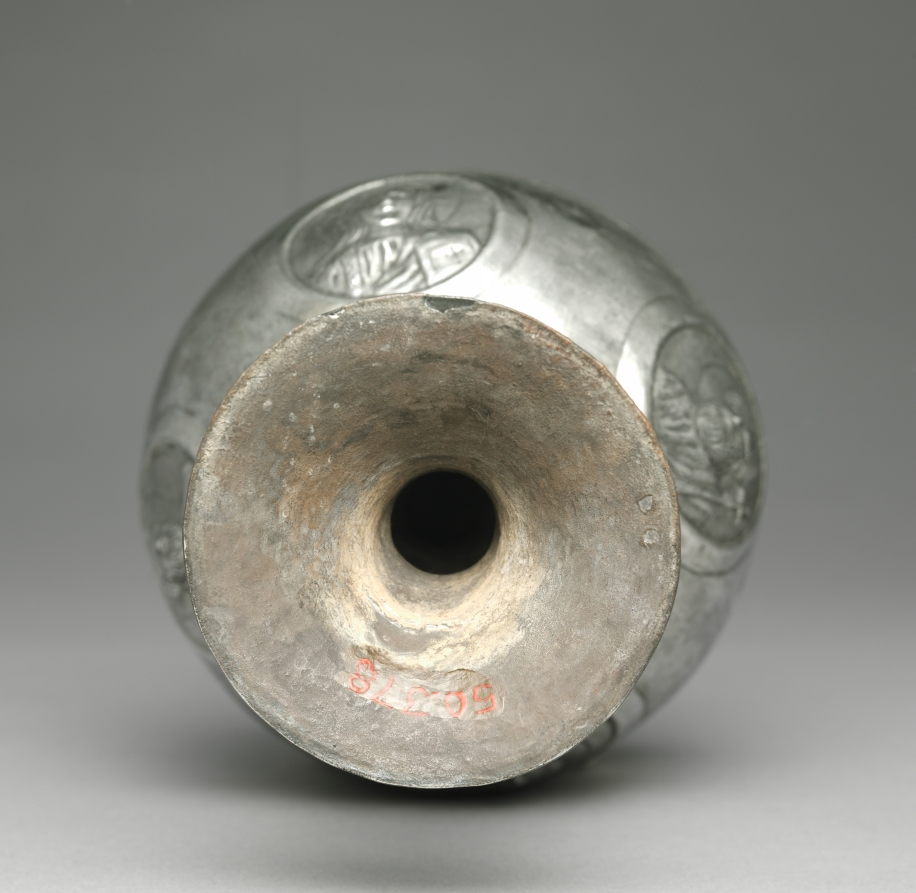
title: Chalice from the Beth Misona Treasure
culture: early Byzantium, Constantinople or Syria, Byzantine period, 6th-7th Century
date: c. 500–700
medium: silver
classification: Metalwork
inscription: the Greek inscription at the top, under an engraved line translates as: + The priest, KYRIAKOS, son of DOMNOS, (gave this chalice) to St. Sergios, in the time of Zeno the priest.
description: These four liturgical silver vessels—a paten and three chalices (1950.378–81)—form what is now called the Beth Misona Treasure, named for the village in northern Syria for which the objects were made. While nothing is known about the exact location and circumstances of the treasure's discovery, the people of the village of Beth Misona were, like other Christian communities in Syria and Palestine, probably forced to bury their church silver to hide it from the Persians or Arabs, who conquered their lands in the first half of the 600s. The paten, which held pieces of Eucharistic bread used during Mass, is decorated with an engraved Latin cross surrounded by a dedicatory inscription that names the paten's donor—Domnos—and its original location, the church of Saint Sergios in Beth Misona. The chalices, which contained the Eucharistic wine used during Mass, feature broad cups decorated with portrait busts of Saints Peter and Paul, Christ, and the Virgin. One chalice bears a dedicatory inscription naming its donor—Kyriakos, Domnos's son—and the priest of the church that received the pious gift—Zeno.